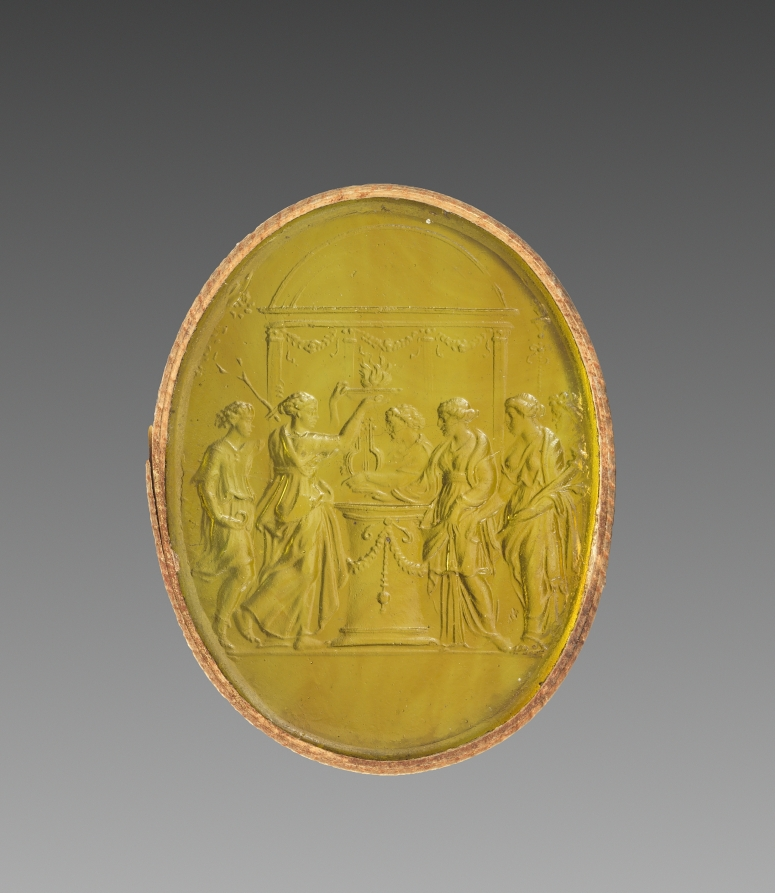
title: Intaglio: Classical Scene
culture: Italy (?), 18th century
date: 1700s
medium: glass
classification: Miscellaneous